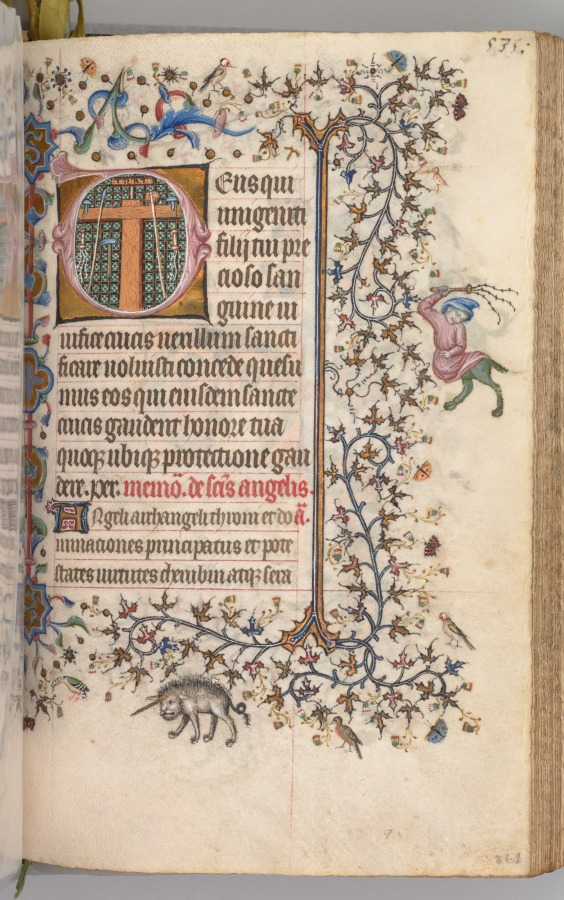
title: Hours of Charles the Noble, King of Navarre (1361-1425): fol. 262r, Instruments of the Passion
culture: France, Paris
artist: Master of the Brussels Initials and Associates (French)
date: c. 1405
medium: ink, tempera, and gold on vellum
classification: Bound Volume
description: This precious volume was obviously highly prized by its owner, the French-born King of Navarre, who had his coat of arms painted on no less than twenty folios. Rather than directly commissioning this manuscript from a specific workshop, it seems that Charles the Noble acquired his book of hours -- perhaps ready-made for the luxury market -- while on a trip to Paris in 1404-05. A collaborative effort, six painting styles are evidenced within the pages of this codex, those of two Italians, two Frenchmen, and two Netherlanders. The painter who was responsible for the planning and decoration of the book, and who produced seventeen of the large miniatures, was a Bolognese artist known as the Master of the Brussels Initials. His principal assistant, responsible for most of the borders, was a Florentine who signed his name "Zecho" da Firenze on folio 208 verso.